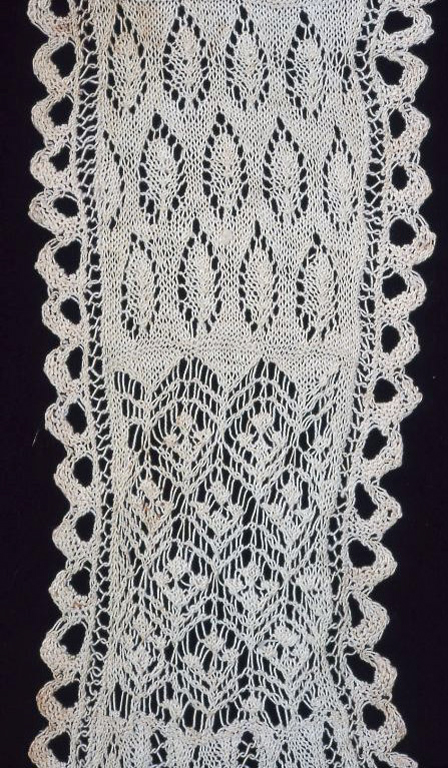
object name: Textile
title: Sampler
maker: Anna Warner (Austrian, active c. 1857); Vienna, Austria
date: 1857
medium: Cotton, knitted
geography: Vienna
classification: textile; needlework (visual works)